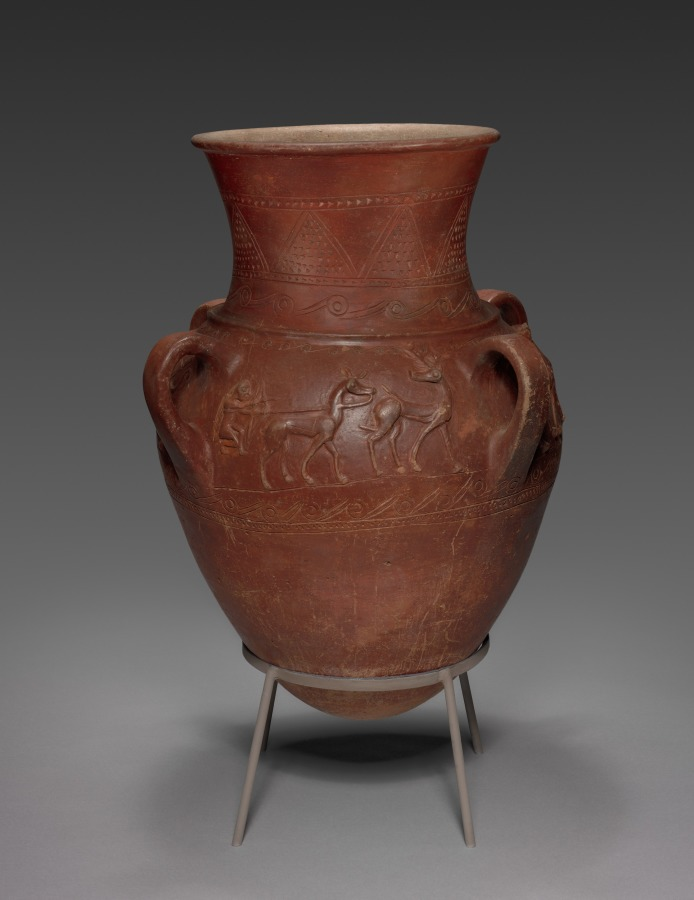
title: Hittite Vessel with Four Scenes Molded and Carved in Relief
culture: Eastern Turkey, Hittite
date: 1400–1200 BCE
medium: burnished earthenware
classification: Ceramic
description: The Hittites were a powerful people who vied with the Egyptians for control of the Near East. At times, however, alliances in the form of royal marriages were forged between the two rivals. The scene on the front of this vase shows a seated god or king holding a drinking vase in the form of a stag. Near him is a large-handled vessel in a ring stand, which illustrates how large jars such as this one were used. The standing figure is a priest pouring a liquid offering. The scene on the back of this vase shows a bow hunter using a doe with a tether as a decoy to attract a stag. Some of the hunter's arrows have already pierced the stag's hide.